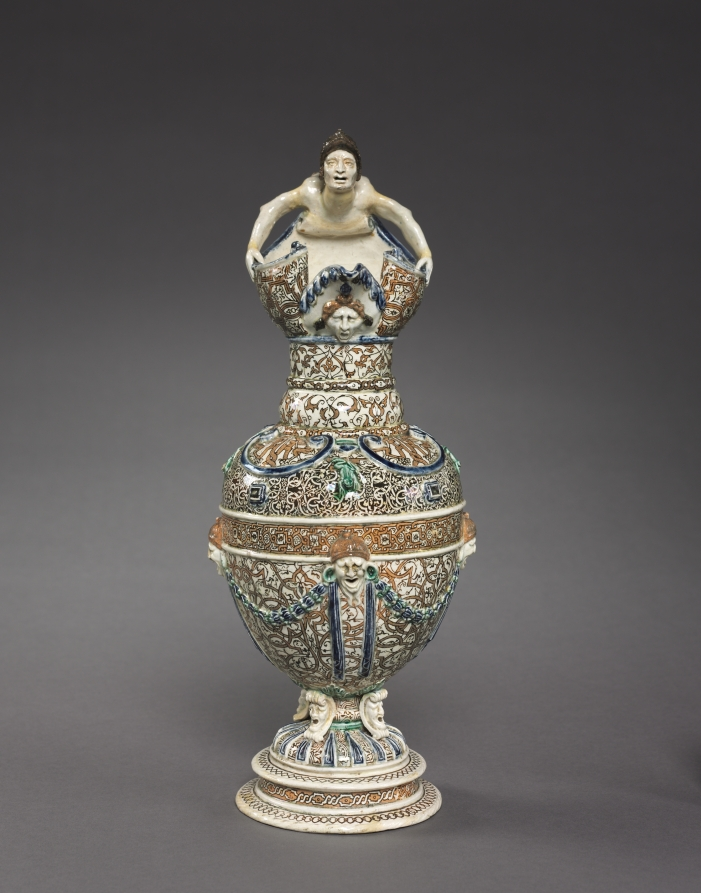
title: Ewer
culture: France, 16th century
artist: Saint-Porchaire (French)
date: c. 1540–67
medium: lead-glazed, white-paste earthenware with inlaid slip decoration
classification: Ceramic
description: An example of one of the most extravagant wares of this kind, this ewer is decorated with applied masks and frogs as well as a variety of stamped and inlaid designs. The shape and patterns reflect the metalwork of the time—the final period of this artistic pottery.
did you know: The green tree frog was one of the symbols of French King Henri II, indicating that this ewer may have either been made for the king or one of his courtiers.